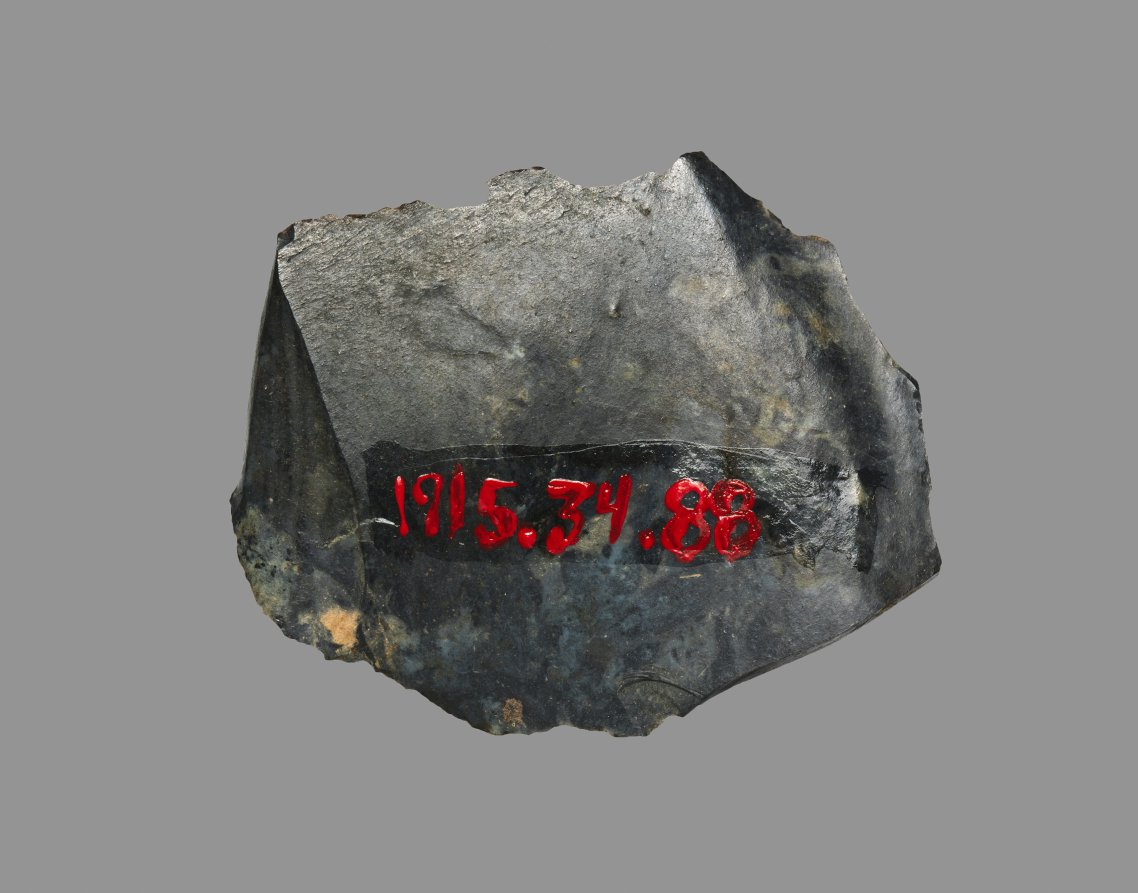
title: Sickle Blade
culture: Egypt, Middle Kingdom (2040–1648 BCE), Dynasty 12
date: 1980–1801 BCE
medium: flint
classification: Implements